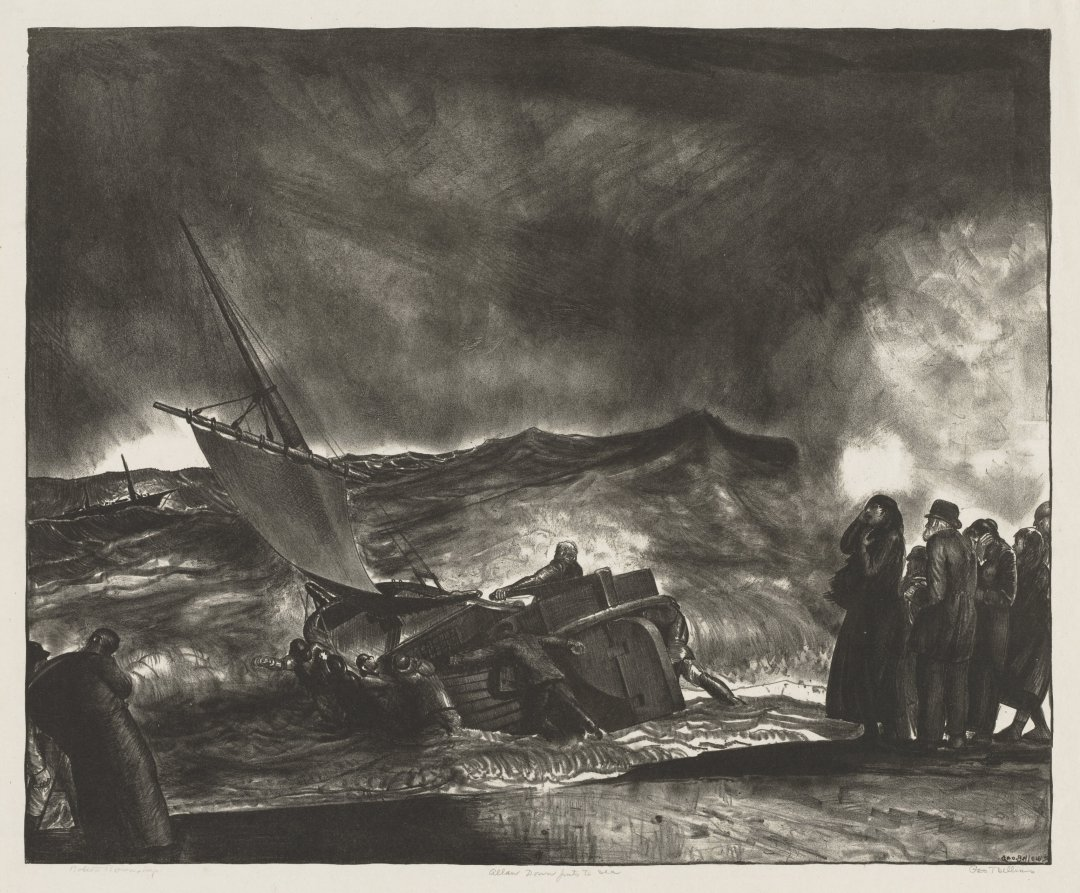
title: Allan Donn Puts to Sea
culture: America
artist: George Bellows (American, 1882–1925)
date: 1923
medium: lithograph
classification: Print